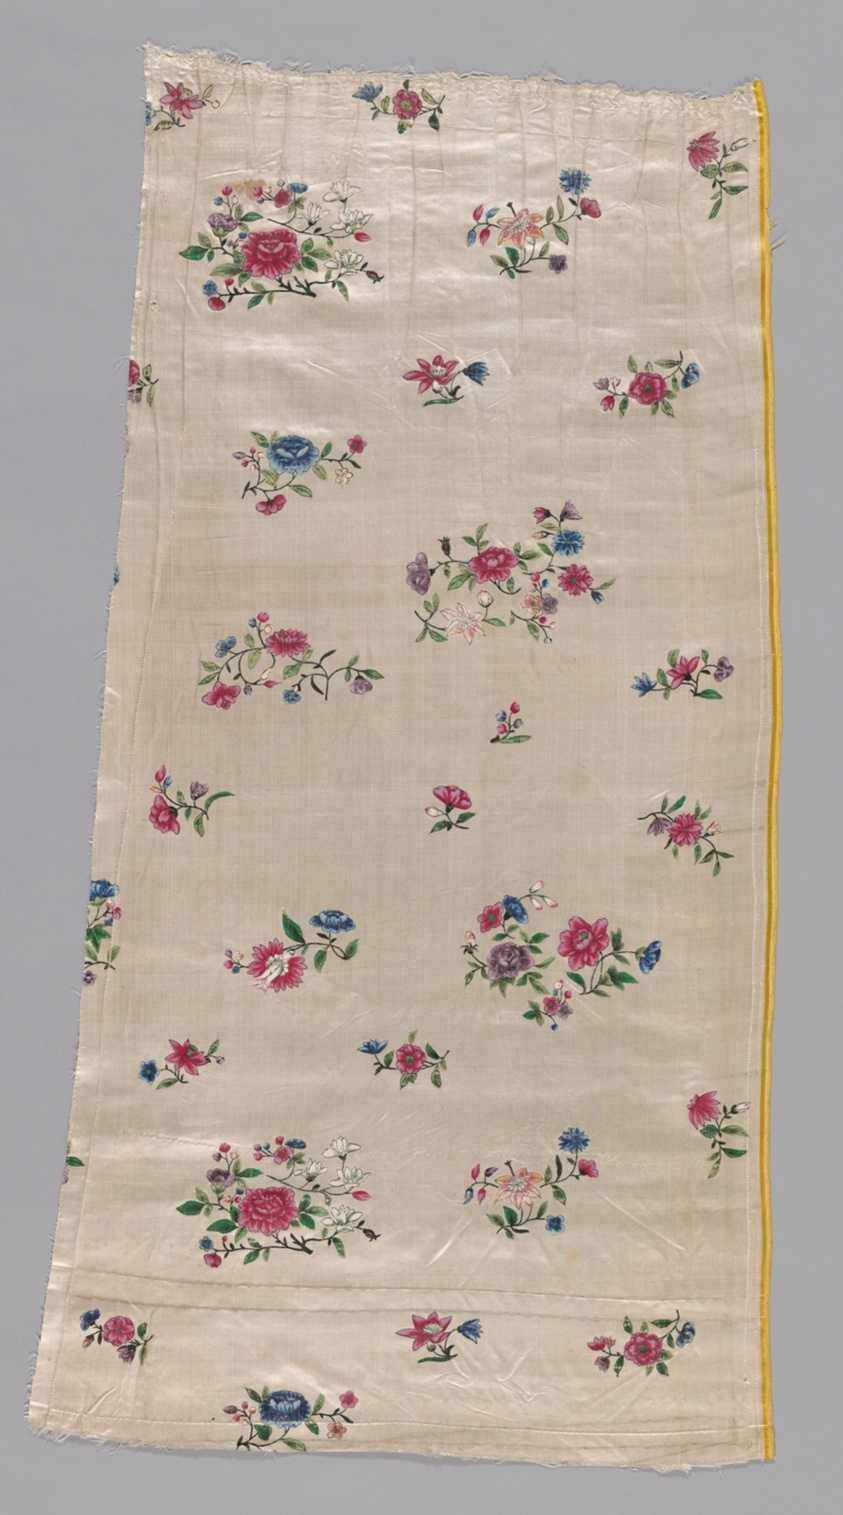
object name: Textile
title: Panel from a Skirt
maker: Made in China for the European/American market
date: 18th century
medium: Silk, satin weave; painted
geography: China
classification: textile; weaving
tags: flowers